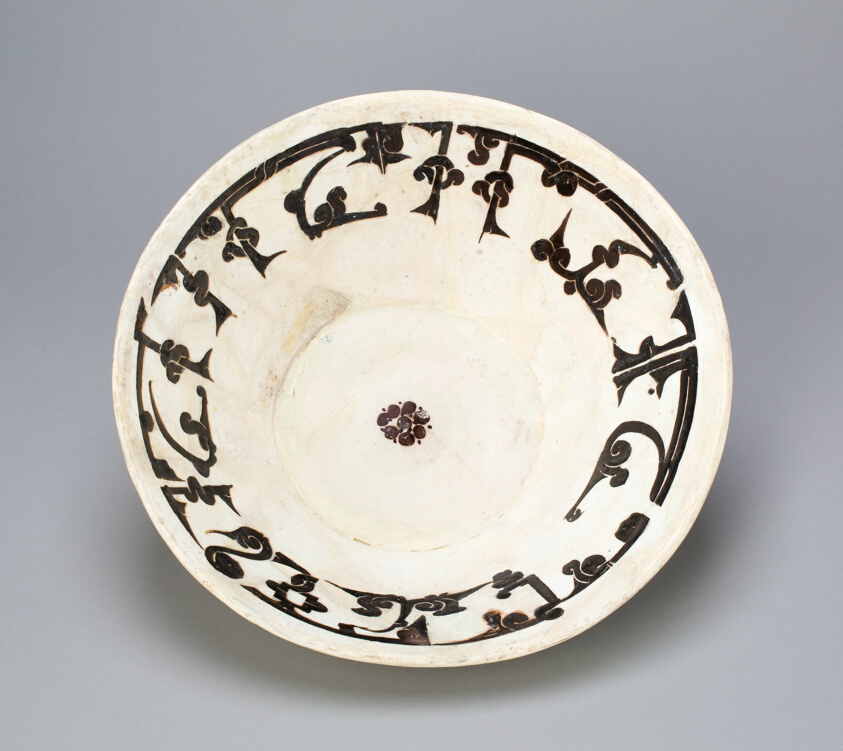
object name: Ceramics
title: Bowl with Calligraphic Design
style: Islamic (culture or style)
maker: Eastern Iran or Central Asia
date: Samanid dynasty (819-1005), 10th century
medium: Earthenware, white slip with black slip decoration under a transparent glaze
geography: Iran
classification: bowl; dish (vessel); vessel